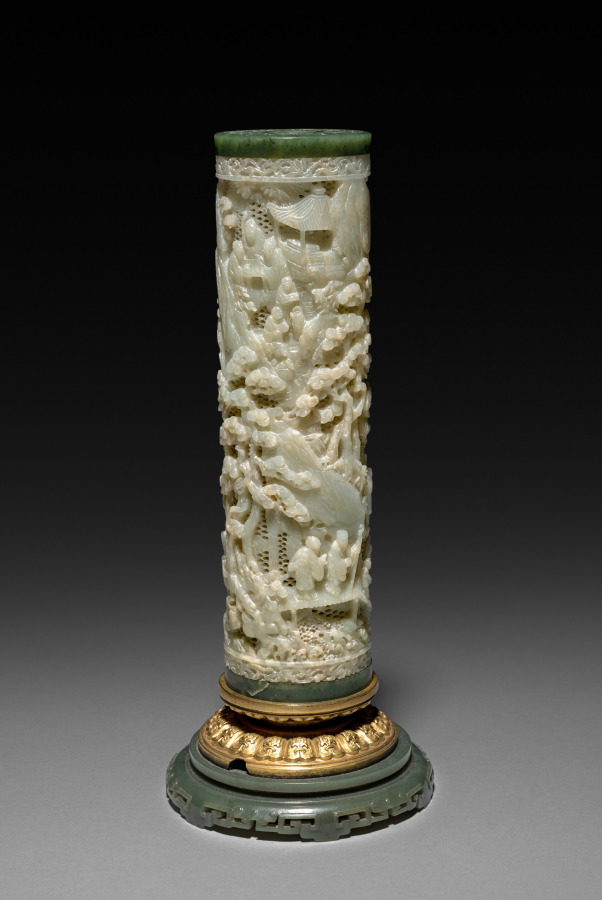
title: Cylinder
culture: China, Qing dynasty (1644-1911) or Republican period (1912-49)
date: 1800–1940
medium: jade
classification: Jade